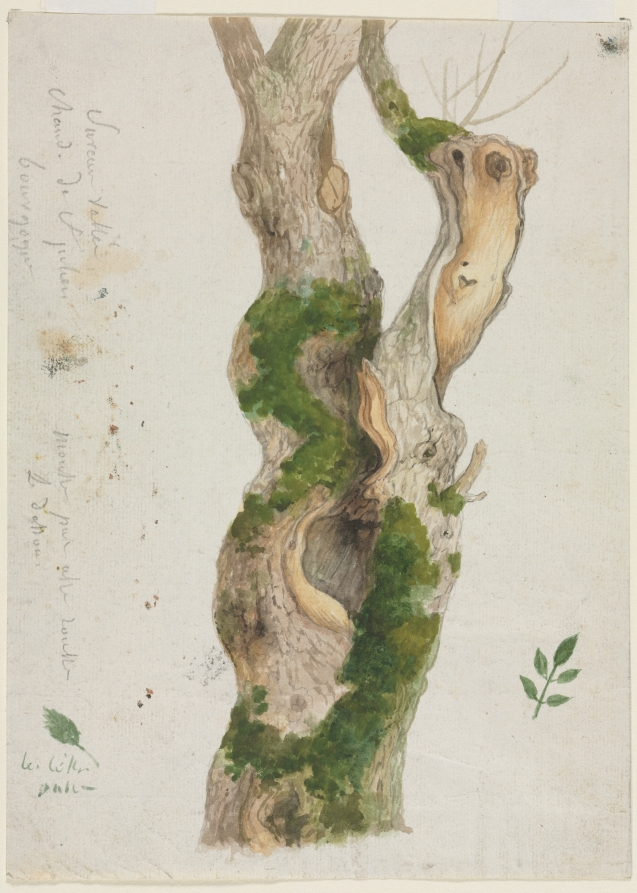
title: Study of a Tree Trunk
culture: France, 18th-19th century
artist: Georges Michel (French, 1763–1843)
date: c. 1775–1843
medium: Graphite and watercolor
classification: Drawing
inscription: Inscribed in graphite, lower left: "Michel" (recto) illegible inscriptions along left margin in graphite (verso)